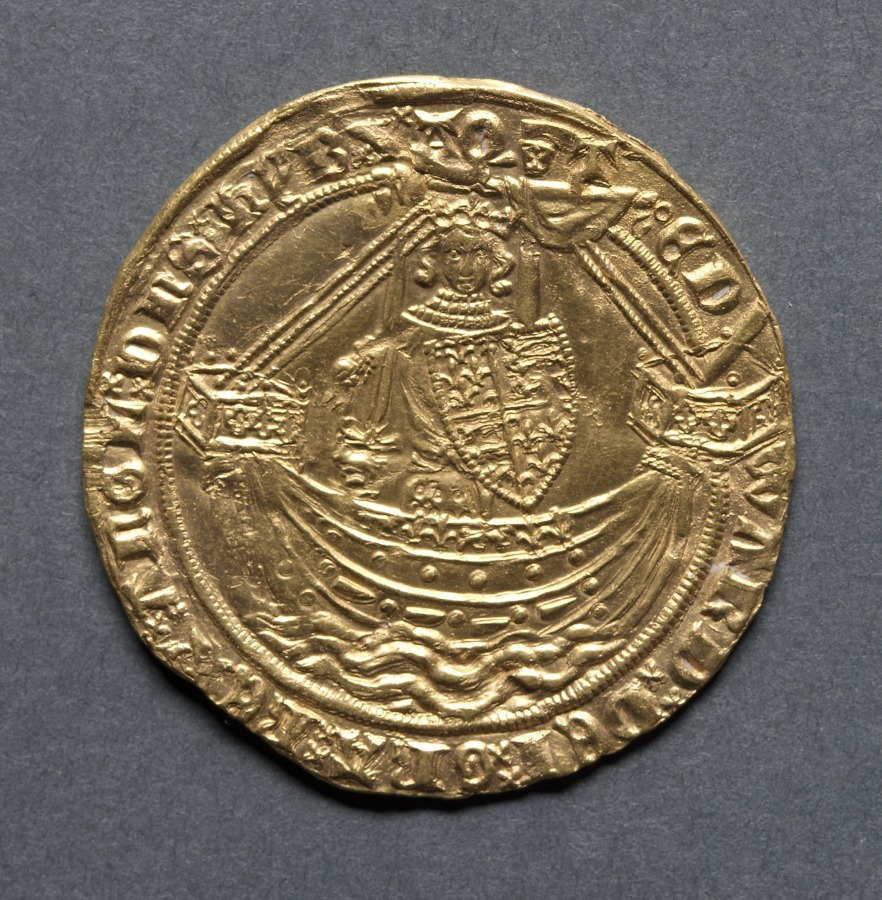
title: Noble: Edward III Standing in Ship with Shield of Arms (obverse); Ornamental Cross with Lis Terminals (reverse)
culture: England, Edward III, 1327-1377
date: 1363–69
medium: gold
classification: Coins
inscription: EDWARD DEI GRA REX ANGL DNS HYB Z AQT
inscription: IHC. AVTEM TRANSIENS PER MEDIV. ILLORVM IBAT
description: Part of the "Treaty Series" of coins, this is a reference to the Treaty of Bretigni, signed between England and France on May 8, 1360. It was negotiated because of the continued successes of Edward III in his continental wars. Among many other territorial points agreed, the English renounced their pretensions to the crown of France. This affected the king's titles as shown on the coinage. On previous coins the king's titles were "Edward, By the Grace of God of England, France, and Ireland King." Now they read, "Edward, by the Grace of God of England and Ireland, King, Duke of Aquitaine." The treaty was later broken and on the "post-treaty" period nobles the title of King of France was resumed.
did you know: In the center of the cross on the reverse of this coin is a letter E for Edward.